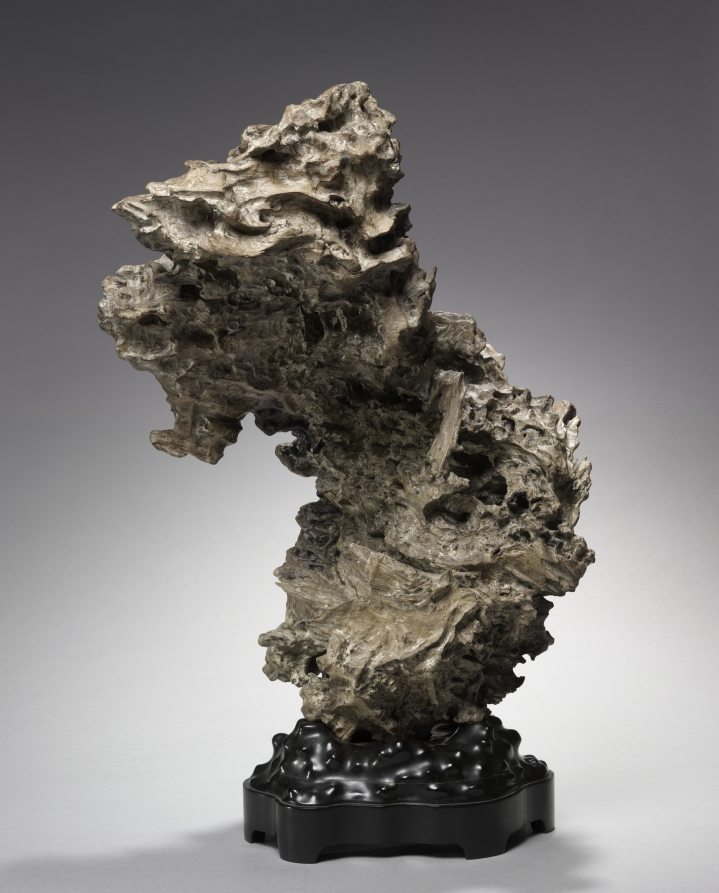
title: Tree Root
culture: China, Qing dynasty (1644-1911)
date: before 1800s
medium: wood with carved base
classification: Miscellaneous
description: Here, the twists and turns, ebb and flow of the natural form of the tree root can be interpreted as the energy that gives life and the endless transformations in the universe. The rugged appearance is appreciated for its association with the aesthetic concepts of eccentricity and archaism in Chinese art.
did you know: Root sculptures are shaped by the inherent nature of the root rather than being carved.